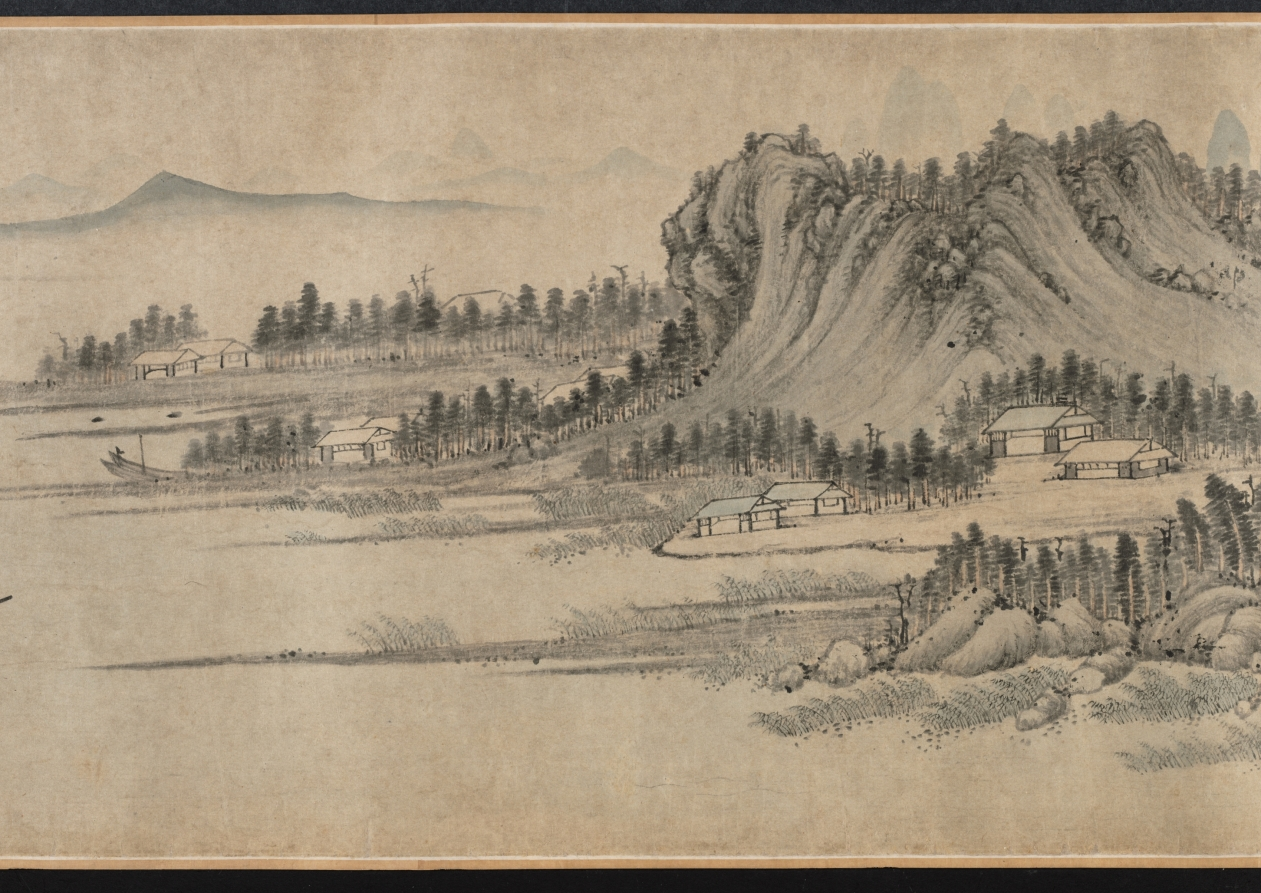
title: Mt. Taibo in the Style of Wang Meng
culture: China, Ming dynasty (1368–1644)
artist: Du Qiong (Chinese, 1396–1474)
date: 1442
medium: handscroll; ink and light color on paper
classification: Painting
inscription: Artist's inscription, signature, and 11 seals: [1 seal] Tung-yüan chai. Huang-ho-shan-ch'iao [Wang Meng] painted a painted called T'ai-po Mountain. Its brushwork is superior and admirable, which is very close to Yu-ch'en [Wang Wei, 699-759]. The cleverness of its composition, the maple groves and rustic temples, the inaccessible ravines and autumnal plateaus, the periolous peaks and strange rocks, etc., all seem to be so natural. The paper is only a little over eight feet, but the landscape has the range of a thousand miles. Once you open and note the contents, it is as if one were roaming among the mountain peaks enveloped in mist and clouds, and forgot the dusty world. When I first saw this, I was so mixed with excitement and joy that I could not take my hands off the painting. So I put it on the table, and tried my best to imitate it, forgetting sleeping and eating for about three months before it was completed. Although I do not dare to tread in the footsteps of Huang-ho shan ch'iao, I took great pains to capture his spirit in composition and colors. I do not know whether it would pass the judgment of the experts. On the fifteenth day of the fifth month, the seventh year of the Cheng-t'ung year [1442], inscribed by Tung-yüan, Tu Chiung. [2 seals] Yung-chia; Ching-chieh ming-men. [8 seals on painting] Tung-yüan chai; Ching-chieh ming-men; Yung-chia; Tu Ch'iung yin; Tung-yüan (repeated 5 times). trans. WKH/LYSL 3 colophons and 7 additional seals: 1 colophon and 2 seals of Chou Ting (1401-1487); 1 colophon and 2 seals of Wu K'uan (1435-1504); 1 colophon, dated 1655, and 2 seals of Lan Ying (1585-after 1664).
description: When a Chinese painter "imitated" a painting by a past master, the intention was never to produce an exact copy. Du Qiong, the Ming painter from Suzhou, is a case in point. The painting style of this handscroll is actually closer to that of Huang Gongwang (1269–1354) than to the style of Wang Meng (about 1301–1385). Both masters were active during the previous dynasty and are among the so-called Four Great Masters of the Yuan dynasty (1279–1368). In this painting, the interplay of styles, including Du Qiong's own, contribute to an inner dimension that is more than visual. Mt. Taibo is located in the province of Zhejiang and is known for its scenic beauty. In this scroll, however, it is not depicted literally. The image is an ideal representation of mountains in southeastern China.